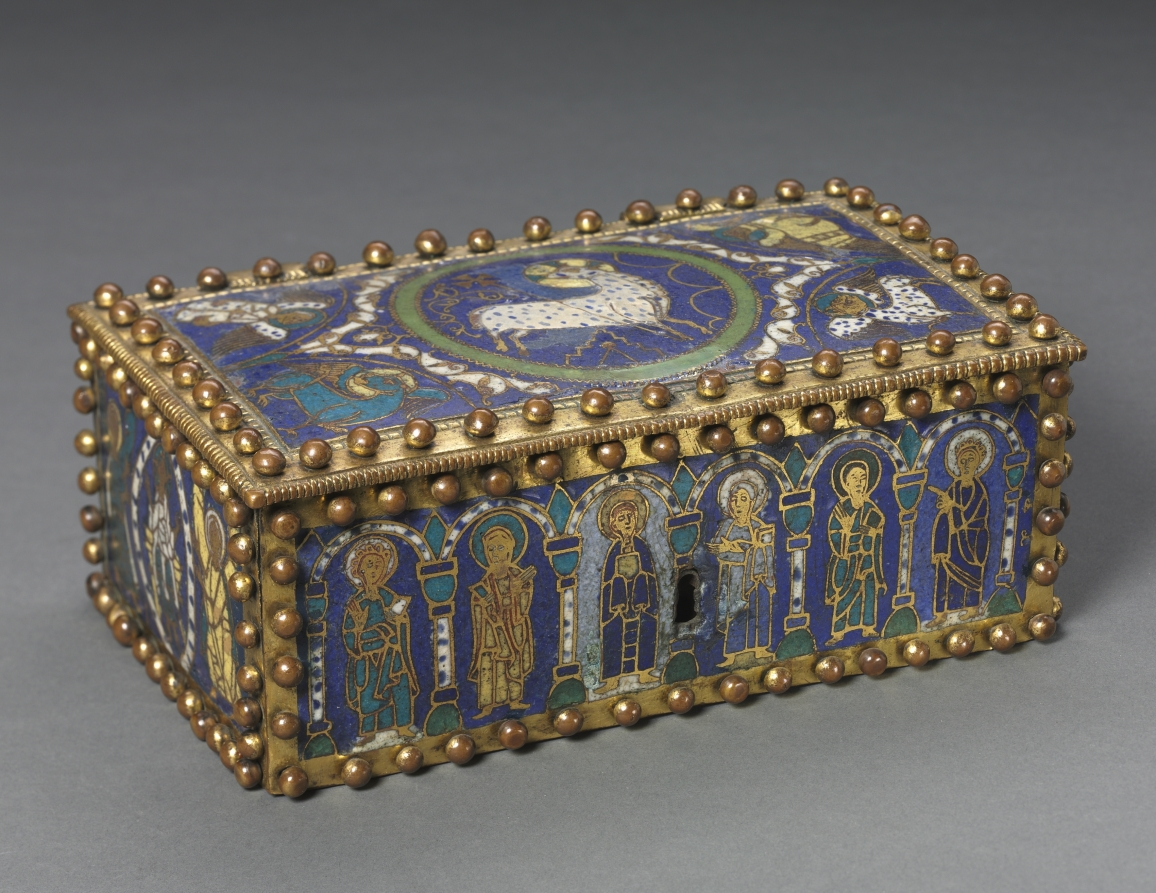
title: Casket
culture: Northern Germany?, Romanesque period, 12th century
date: 1100–1150?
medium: gilded copper, champlevé enamel, wood core (modern)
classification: Enamel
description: This champlevé enamel casket belongs to a distinct group of nine closely related objects characterized by the vivid colors of their enamel decoration and rows of spherical pins placed along the edges of each enamel plaque. Recent X-ray analysis suggests that the casket originally functioned as a stand for an altar cross. Such a function is attested to in at least three related caskets (in Copenhagen, Hildesheim, and Berlin). The casket’s iconographic program features the 12 apostles, placed under arcades (on the long sides), the Crucifixion and Christ in Majesty (on the short sides), and the Lamb of God surrounded by the symbols of the four Evangelists (on the lid).